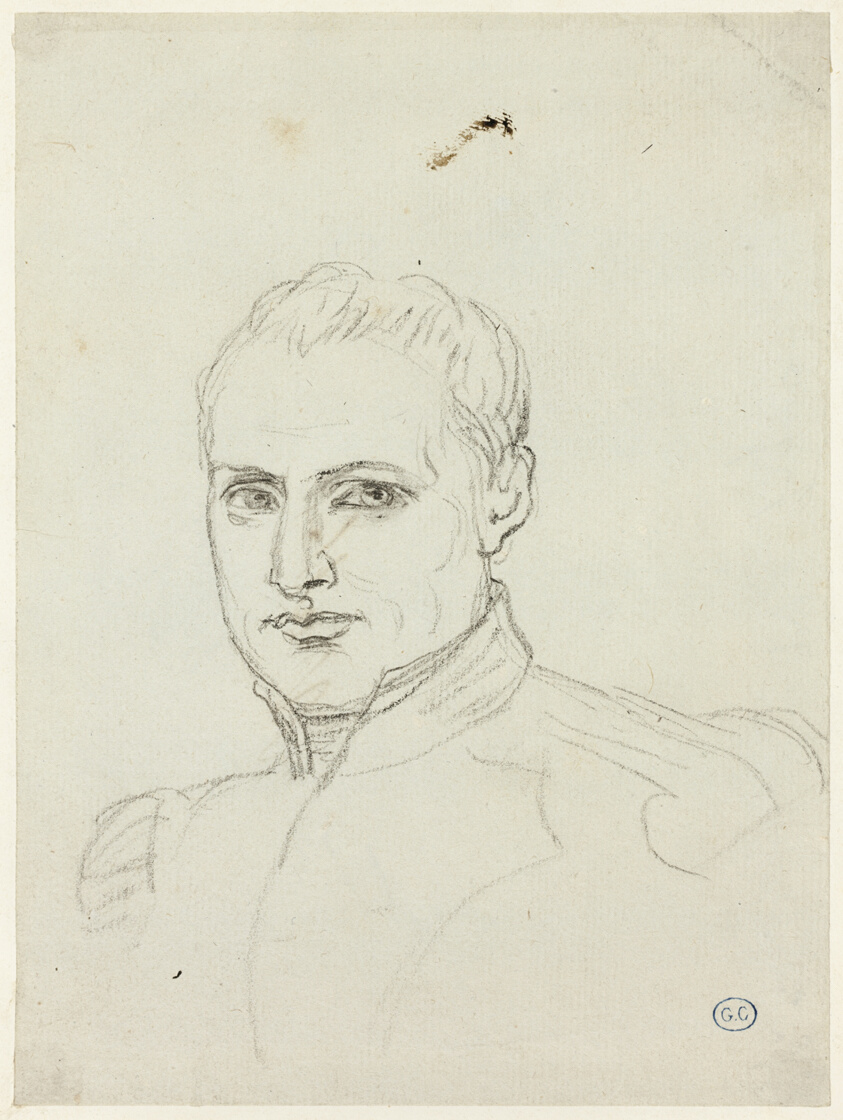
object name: Drawing and Watercolor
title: Study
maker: Jacques-Louis David; French, 1748-1825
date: 1811/1812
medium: Black chalk, with black crayon, on pale blue laid paper, edge mounted on cream wove paper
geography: France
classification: drawings (visual works); prints and drawing